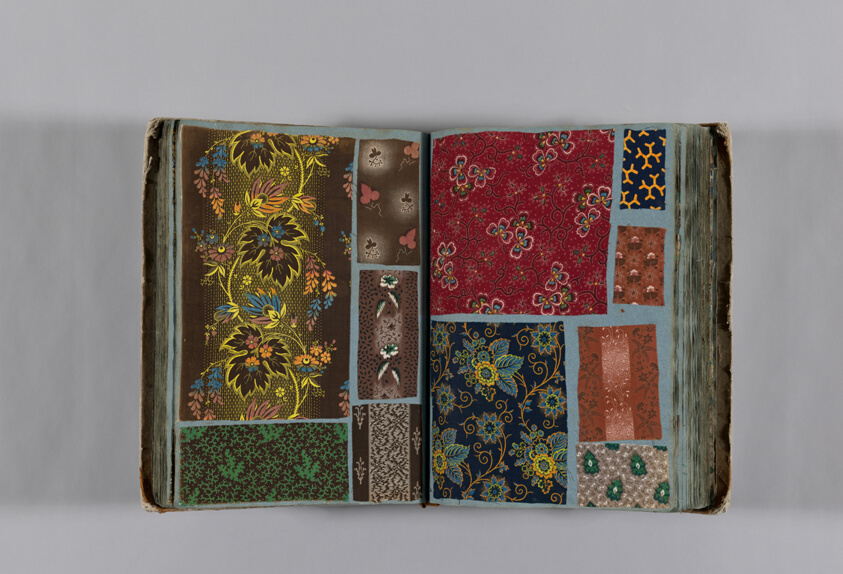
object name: Book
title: Sample book of swatches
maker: Mulhouse, France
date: 19th c.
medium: Sample book of swatches: cotton, plain weave, block printed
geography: France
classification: book; printed; weaving - printed